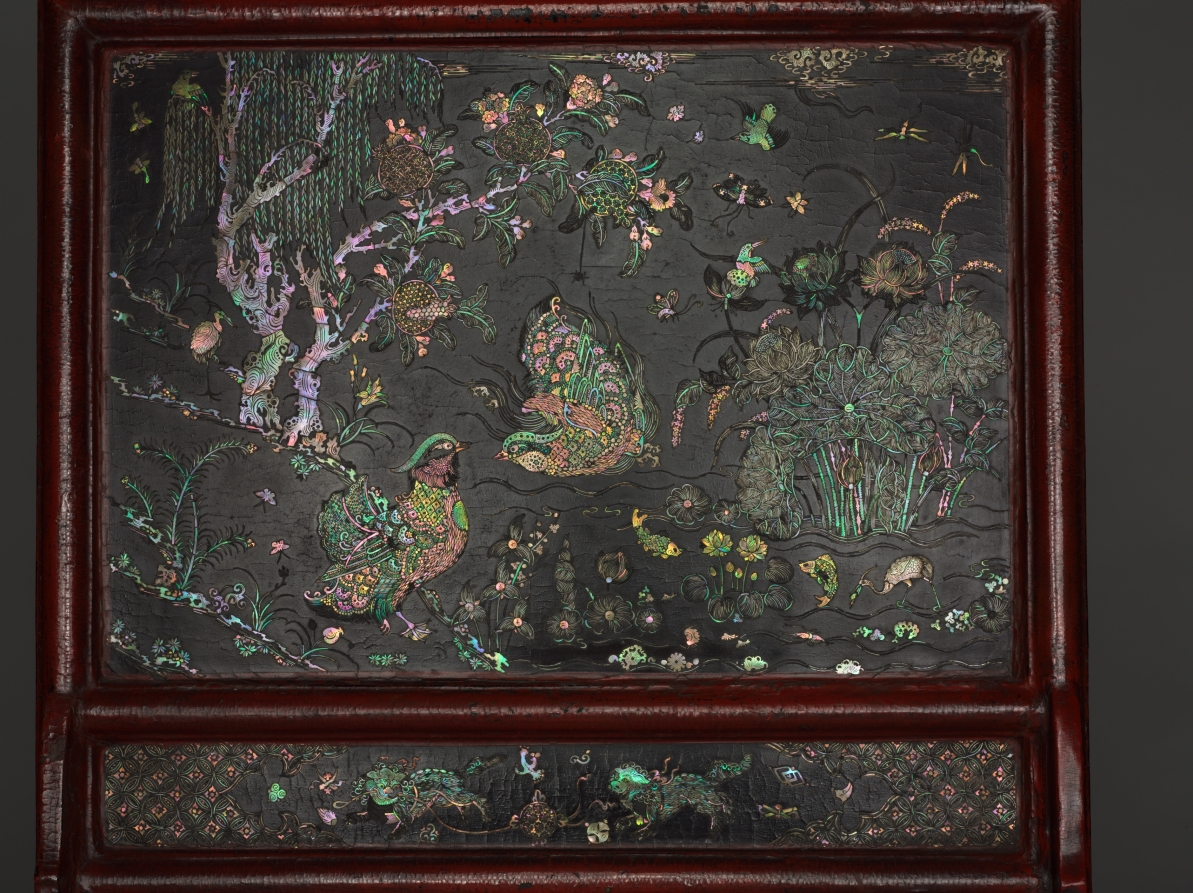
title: Table Screen: The Peach Blossom Spring, Land of the Immortals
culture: China, Yuan dynasty (1271-1368)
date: 1300s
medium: lacquer on wood with mother-of-pearl inlay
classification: Lacquer